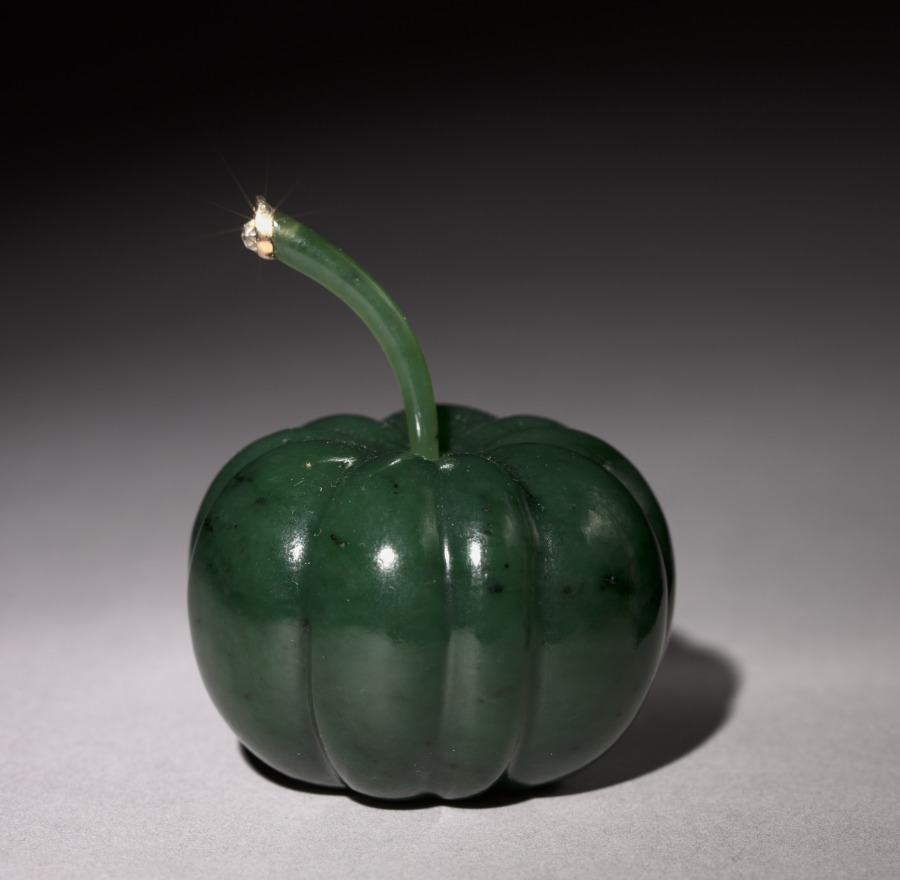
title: Stamp Moistener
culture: Russia, St. Petersburg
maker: firm of House of Fabergé (Russian, 1842–1918)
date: c. 1895–1915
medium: nephrite, diamonds, gold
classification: Miscellaneous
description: This stamp moistener in the form of a green tomato is carved out of a single piece of jade. The stem, tipped by a diamond mounted in gold, is removable. The interior end of this stem holds the brush that is used to wet a stamp for letters.